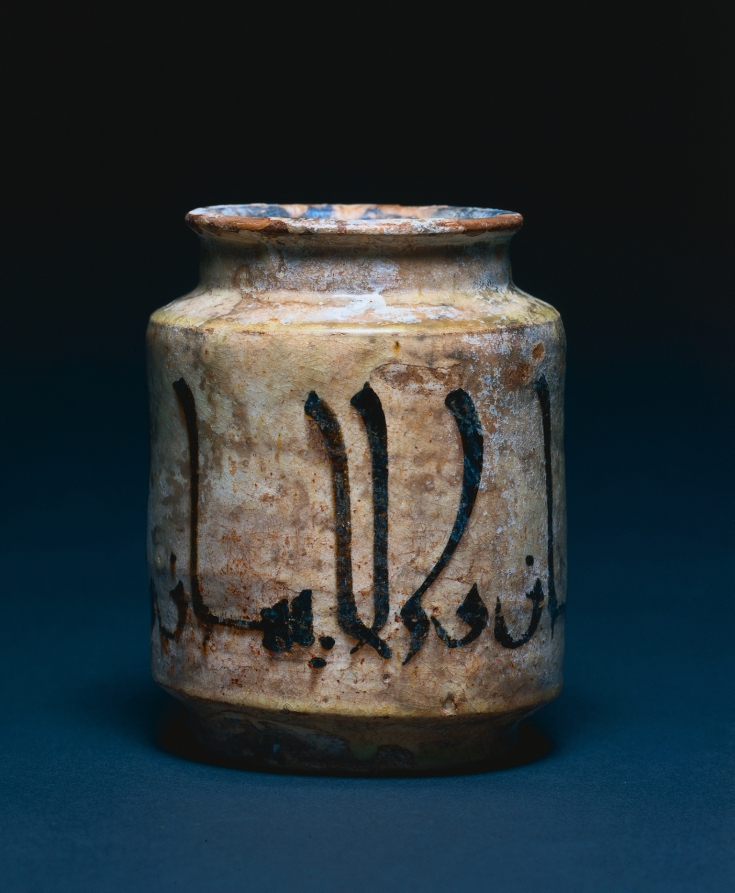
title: Albarello Jar with an Aphorism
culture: Central Asia, Samarkand, Samanid period (819–1005)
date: 900s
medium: Earthenware with underglaze decoration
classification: Ceramic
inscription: In Arabic: al-haya min al-iman w'al-iman min al-janna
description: The albarello was a jar designed to hold ointments and drugs for pharmacists. They were produced in the Middle East and Spain, as well as late medieval and Renaissance Italy. Albarellos are usually painted with floral, vegetal, or geometric designs. Arabic inscriptions are less common but here the elegant text reads: “Modesty [comes] from faith, and faith [comes] from Paradise,” attributed to the Prophet Muhammad.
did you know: The jar's Arabic inscription written in Eastern Kufic script.